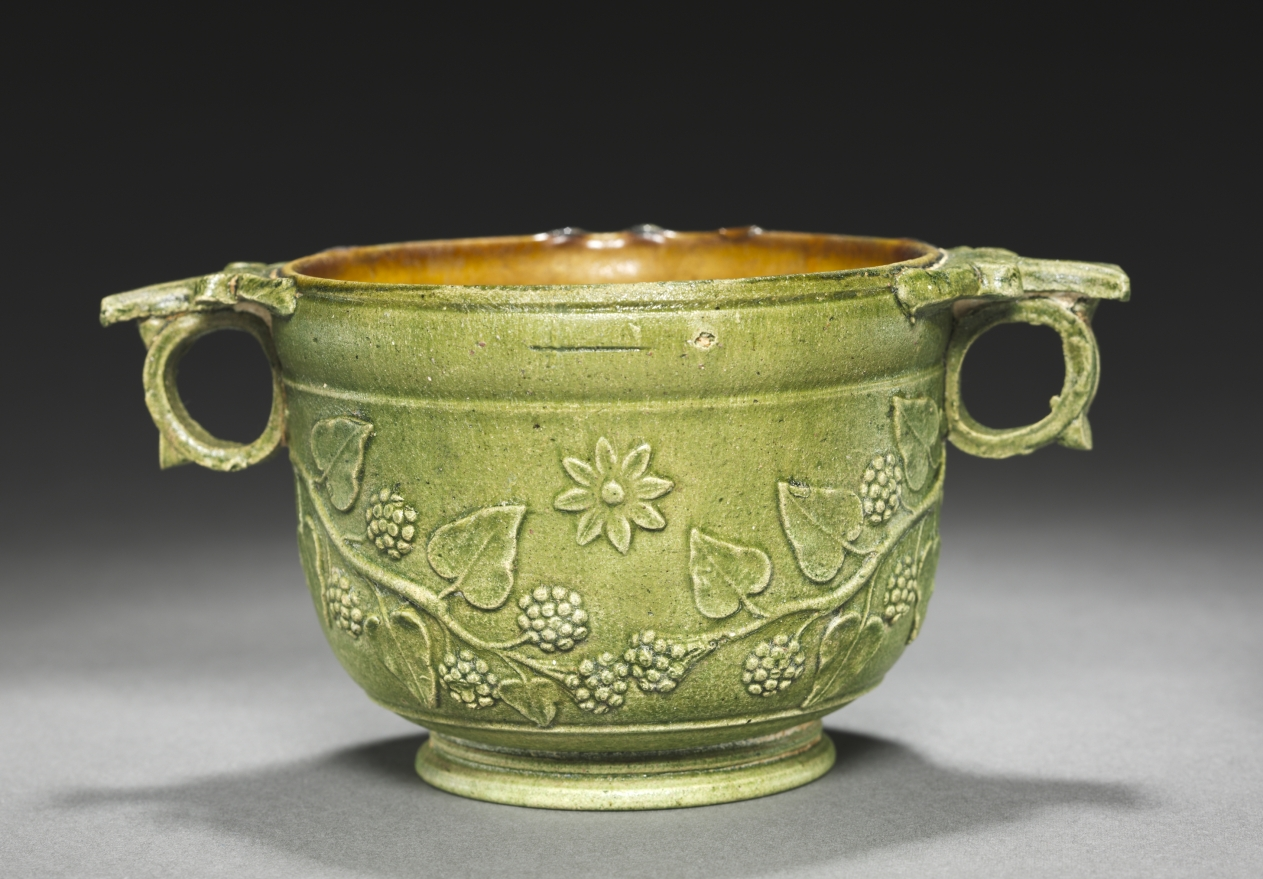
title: Skyphos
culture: probably Turkey, Roman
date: 1–100 CE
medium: earthenware with slip decoration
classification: Ceramic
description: Lead glaze was first used near the Mediterranean basin around 1000 bc, appearing in Mesopotamia and Egypt almost simultaneously. The technique flourished during the Roman Empire, and examples can be found in all reaches of the realm from England and Germany to North Africa, Syria, and Turkey, and perhaps even further east. This is a very fine example of this technique.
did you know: Lead glaze is what gives this wine cup its yellowish-green color.